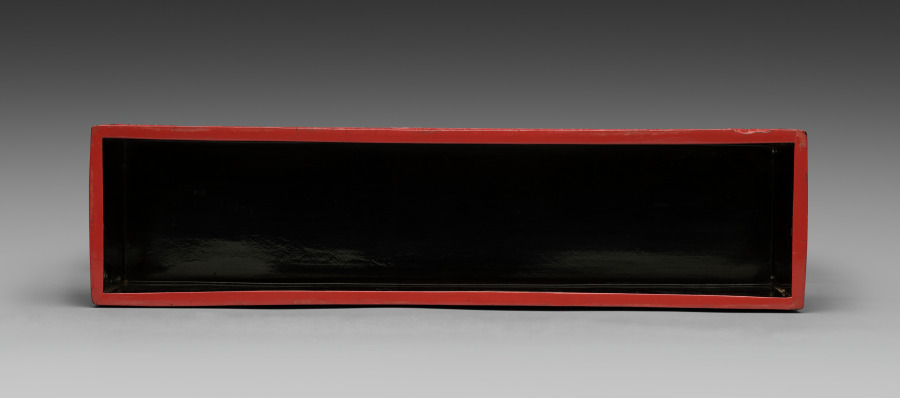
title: Cover for a Carved Lacquer Scroll Box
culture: China, Qing dynasty (1644–1911), Qianlong reign (1736–95)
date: 1736–95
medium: cinnabar carved lacquer on wood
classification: Lacquer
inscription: 心寫治平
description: The elaborate design, superior craftsmanship, and inscription carved into the red cinnabar lacquer proclaim the imperial pedigree of this scroll box. On either end appears a five-clawed dragon, a design reserved only for an emperor. More dragons twist and wind through swirling clouds and waves along the length of the box’s sides and top. The carving is intricate and vigorous, while the design is controlled and regular. This box originally housed the handscroll, CMA 1969.31, private portraits of the Emperor Qianlong, his empress, and 11 other favorites among his presumed 40 or more wives during his 60-year reign.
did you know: This is the original box for the handscroll Portraits of the Qianlong Emperor and His Twelve Consorts, CMA 1969.31.